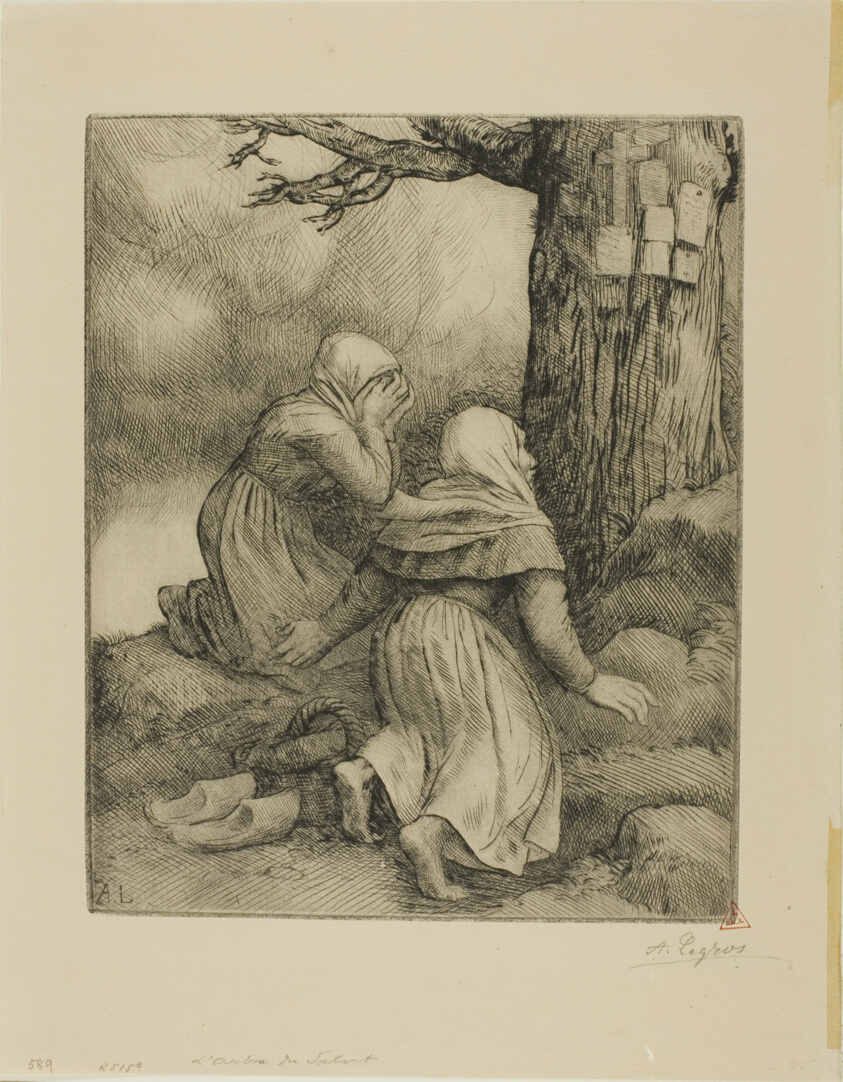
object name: Print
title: The Tree of Salvation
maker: Alphonse Legros (French, 1837-1911)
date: c. 1880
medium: Etching and drypoint on rose-cream laid paper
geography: France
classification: etching; print; prints and drawing